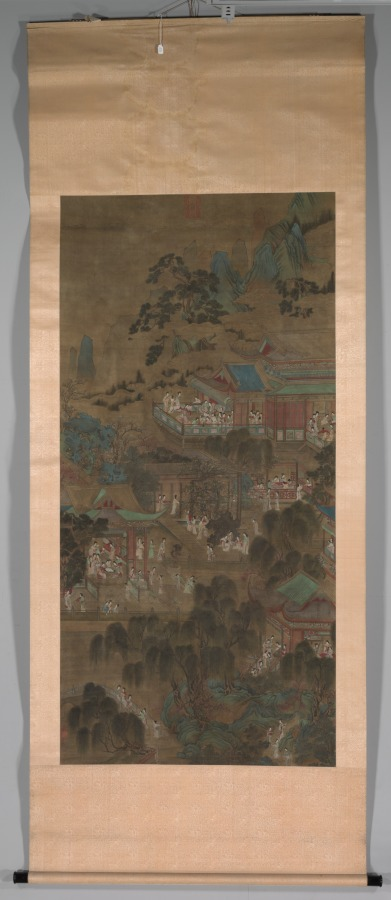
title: Court Ladies in the Imperial Palace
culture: China, Yuan dynasty (1271-1368)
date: 1271–1368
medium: hanging scroll, color on silk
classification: Painting